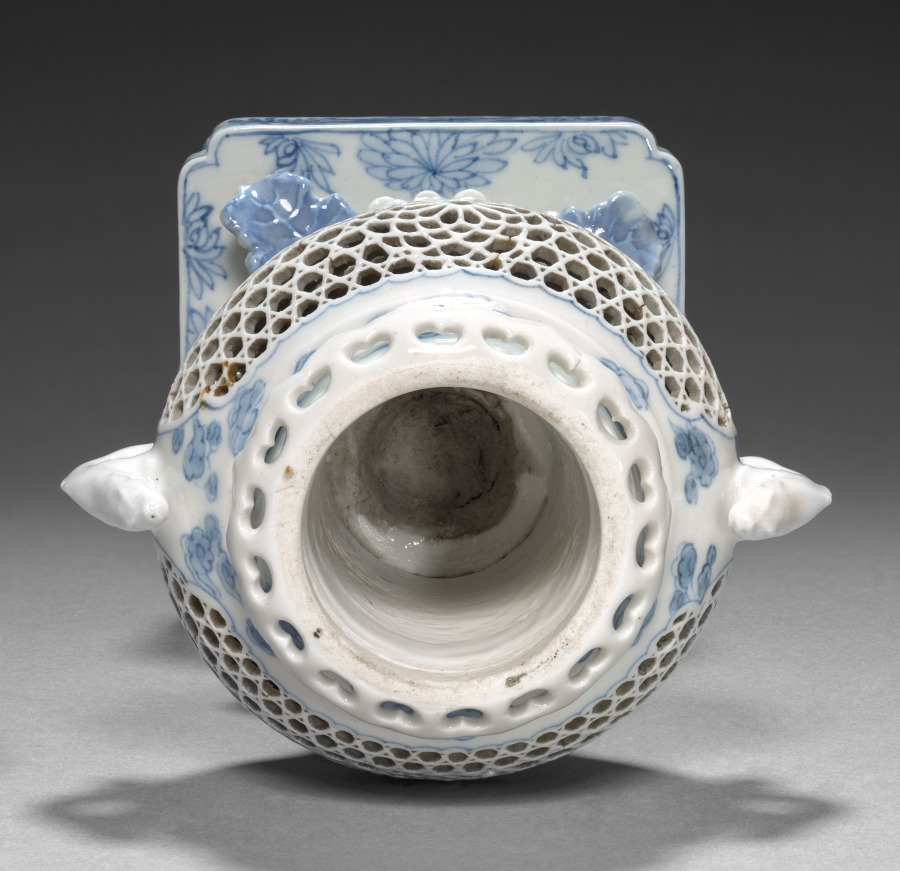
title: Incense Chalice and Cover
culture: Japan, Edo period (1615–1868)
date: 1700s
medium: porcelain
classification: Ceramic